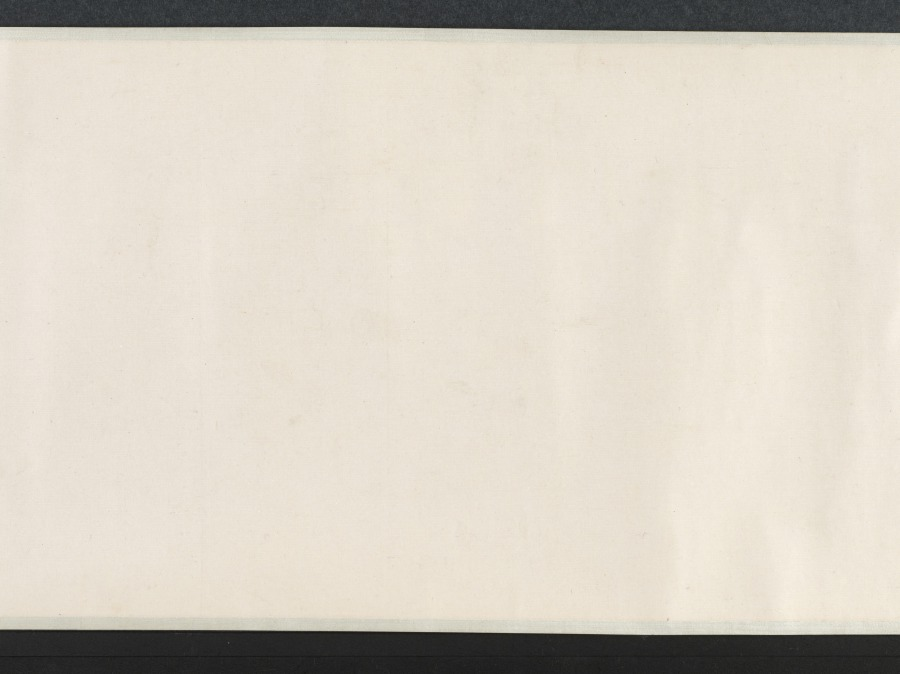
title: Nine Songs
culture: China, Yuan dynasty (1271-1368)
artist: Zhang Wo (Chinese, active c.1336–after 1364)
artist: Chu Huan (Chinese, active 1361)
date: 1361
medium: handscroll; ink on paper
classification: Painting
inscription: 7 colophons and 47 seals: 1 colophon, dated 1361, and 28 seals of Chu Huan 褚奐 (active c. 1361); 1 colophon, dated 1785, and 1 seal of Lu Shihua 陸時化 (1714-1779); 2 seals of Lu Yü-ch'ing (18th c.); 1 colophon, dated 1935, of Ye Gongchuo 葉恭綽 (1881-1968); 1 colophon, dated 1935, of Wu Hufan 吳湖帆(1894–1968); 1 colophon, dated 1938, and 1 seal of Wang Tongyu 王同愈 (1856-1941); 1 colophon, dated 1941, of Wu Huayuan 吳華源 (1893-1972); 1 colophon, dated 1942, and 9 seals of Xu Bangda 徐邦達 (1911–2012); 1 colophon, dated 1942, of Lang Jingshan 郎靜山 (1892-1995); 1 colophon, dated 1944, of Tang Yun 唐雲 (1910-1993); 6 seals of Wang Jiqian [C.C. Wang] 王季遷 (1907–2003).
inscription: Text of The Nine Songs written by Chu Huan at the end of each section.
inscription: 右離騷九歌圖，宋龍溟居士李公本，淮南張渥叔厚所畫妙絕當世。家藏請予書其辭目識于左。至正二十一年辛醜三月旦河南褚奐記。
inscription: Colophon by Lu Shihua 陸時化 (1714–1789): This scroll is fortunate to have been handed down from collections of the right people. Now, after 500 years, its condition is as good as when it was painted. I acquired this from Mr. Shen Guiyu [1673-1769], the President of the Board of Rites. The label is in his handwriting when he was 95 years old. I submit that Chu Huan (t. Shiwen) of the Yuan Dynasty was a native of Qiantang. His "seal" and li writings are in the style of Wu Rui. For example, in [Chu Kuei's] Ming ji lu [A list of masterpieces] is recorded the stele commemorating the restoration of the prefectural school of Kun-shan, the text of which was composed by Yang Weizhen in the twenty-first year of Zhizheng [1361]; and the calligraphy as well as the title in li style was by Chu Huan, who was at that time an assistant judge of the prefecture of Haining in the circuit of Hangzhou. Zhang Wo's zi is Shuhou (叔厚). His literary name is Zhen Qisheng (贞期生). According to [Gu Ying's] Yu shan cao tang ya jii, he liked to paint in the bai-miao or the "pure delineation" style after the method of Li Longmian [Li Gonglin 李公麟], which finds no peer among the ancient masters. This is agreed upon [by Pei Ch'iung] in his Qing jiang zhi who praised [Zhang Wo] as being quite learned and well-versed in many branches of the arts, especially figure painting. Recorded by Lu Shihua [The mountain dweller], listening to the pine, in the twelfth month of the yisi year [1785].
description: Painted in the baimiao, or fine-line drawing style, this ancient work demonstrates the literati’s use of abstract calligraphic brushwork for self-expression. The subject of the “Nine Songs”—songs associated with shamanistic rituals in the ancient Chu kingdom—had traditionally provided artists with myths and legends that they could explore and reinterpret in their own works.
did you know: Divided into eleven sections, the scroll contains illustrations by painter Zhang Wu followed by a transcription of the relevant verse by calligrapher Chu Huan.